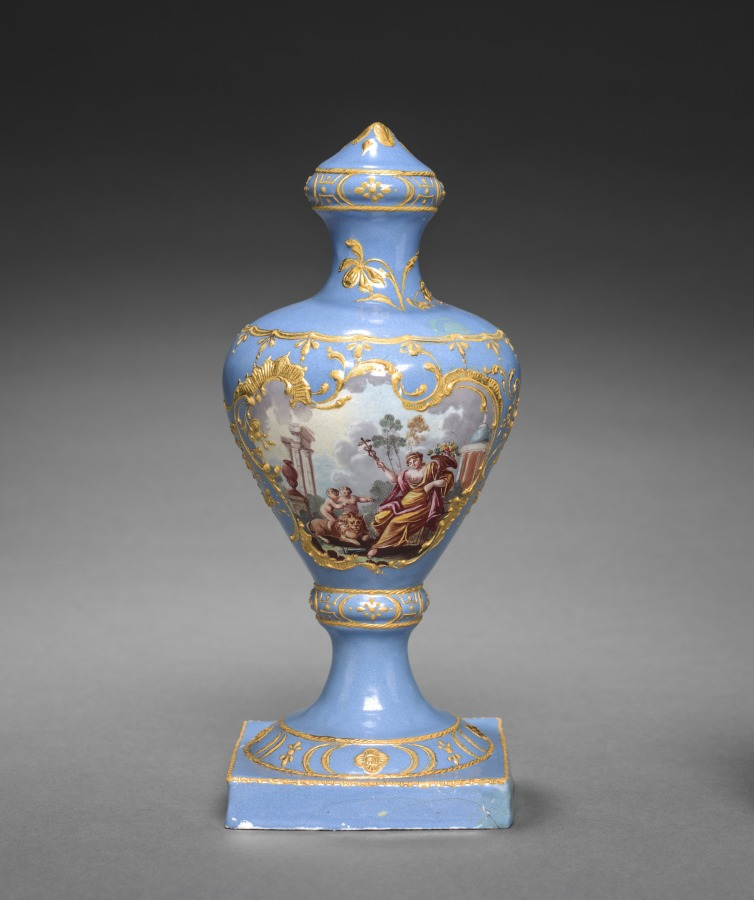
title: Urn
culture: England, South Staffordshire, 18th century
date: c. 1770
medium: enamel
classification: Enamel